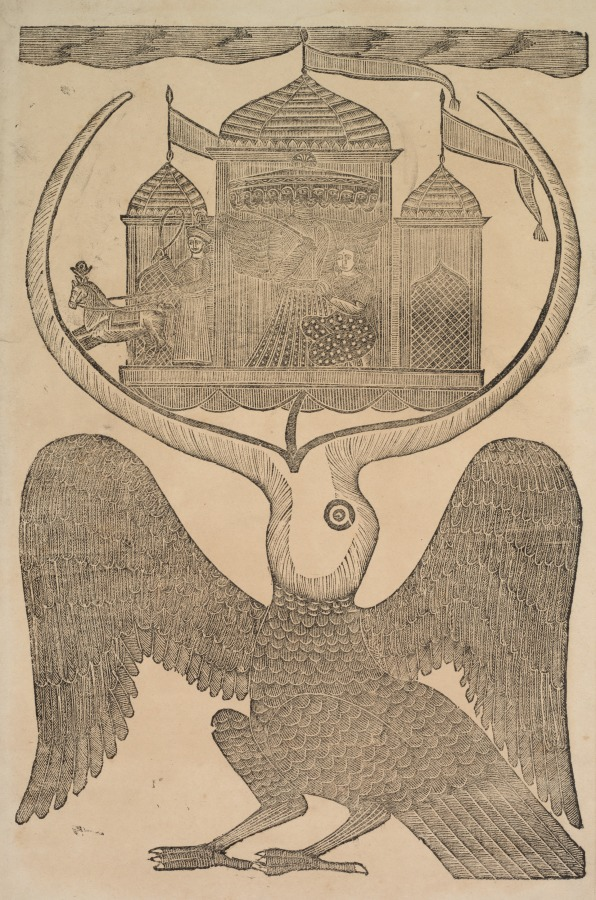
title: Jatayu hinders Ravana’s chariot trying to prevent Sita’s abduction (recto), from a Kalighat album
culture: Eastern India, Bengal, Kolkata, Kalighat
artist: Shri Gobinda Chandra Roy (Indian, active late 1800s)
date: c. 1890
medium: woodcut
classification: Print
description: As ten-headed Ravana successfully flies away with his quarry, Princess Sita, the demon king is stopped by the great vulture Jatayu, an ally to Sita’s husband Rama. Closely resembling the Bengali paintings of the same subject, a woodcut print was a less expensive alternative to a painting. Almost any resident of the burgeoning city of Calcutta (now Kolkata) could afford to acquire one. Woodcuts such as this were made on paper that Christian missionaries intended for the production of Bibles. However, local artists used it to mass-produce popular Hindu imagery.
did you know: In the Bengali version of this episode, Jatayu swallows Ravana’s chariot only to vomit it out once he realizes Sita is aboard.